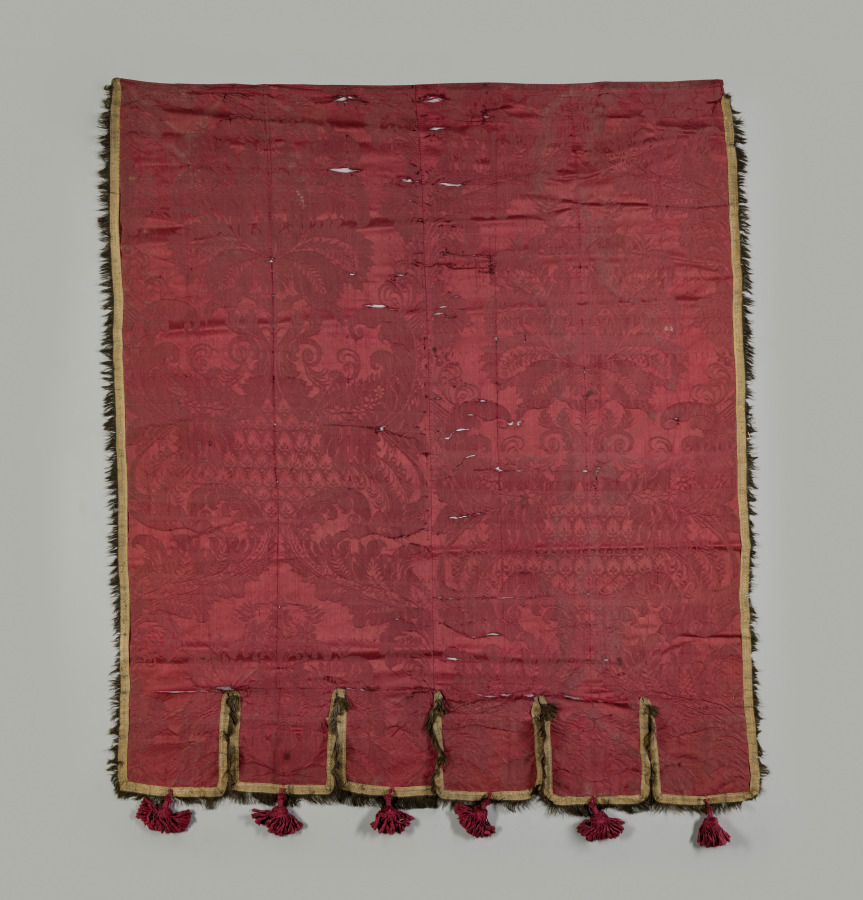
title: Banner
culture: Spain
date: 1700s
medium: crimson silk brocade; scalloped border with fringe and tassels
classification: Textile